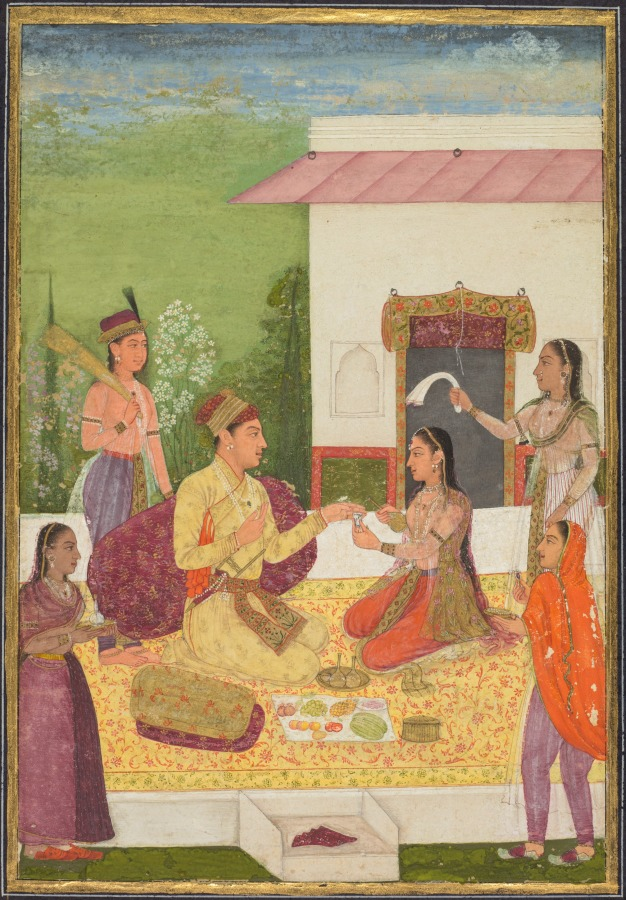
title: A prince conversing with a woman while taking refreshments on a terrace (recto); Calligraphy (verso)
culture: Mughal India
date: c. 1710–20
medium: Gum tempera, ink, and gold on paper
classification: Painting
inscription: Verso: From a Bustan (Fragrant Herb Garden) of Sa‘di (Persian, 1210–1291). Persian text in nasta‘liq script: Why do the adherents of Idea to this not cleave—/ That only the Elect may go in water or in fire?/ As for the infant, uninformed of fire,/ Does not his mother guard him lovingly?/ Those, then, who’re drowned in ecstasy/ By night and day are in the very care of Truth:/ He guards the Friend against the fire’s heat/ As Moses’s crib against the whirlpools of the Nile;/ When an infant’s in a swimmer’s arms/ He knows no fear, broad though the Tigris be;/ But how shall you step on the ocean’s face/ As do real men, when even on dry land your skirt is wet?/ The way of the intellect is all twists and turns,/ But the concern of the gnostics is for God alone!/ This can be said to those who recognize realities,/ Though adherents of analogy may carp thereat and say:/ “What, then, is heaven, and what earth besides?/ Who are the sons of Adam, and the beasts both wild and tame?”/ A proper thing you’ve asked, O prudent one!/ I’ll tell you—if you find the answer proper:/ The plain and the ocean, the mountain and the sky,/ Pari and manchild, demon and angel—/ All, whatsoever they be, are less than That/ By virtue of Whose being they utter being’s name!/ Monstrous before you, with its waves, lies the ocean;/ High is the sun, all ablaze at the zenith; (after Wickens 1974, 113)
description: The carpet turns a terrace into a space where a prince can enjoy the company of women over wine and fruits. A covered box on the carpet contains aromatic betel nut packets for pleasurable chewing. He has removed his shoes, which are left on the marble step. A princess pours liquor from a golden bottle into a tiny blue-and-white ceramic cup. The pair’s royal status is indicated by the attendants who hold the white cloth and peacock-feather whisks. Two other women bring jewels and a vial of perfume to be inspected and discussed by the royal connoisseurs.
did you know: The prince removed his shoes before joining the picnic on the carpeted terrace.